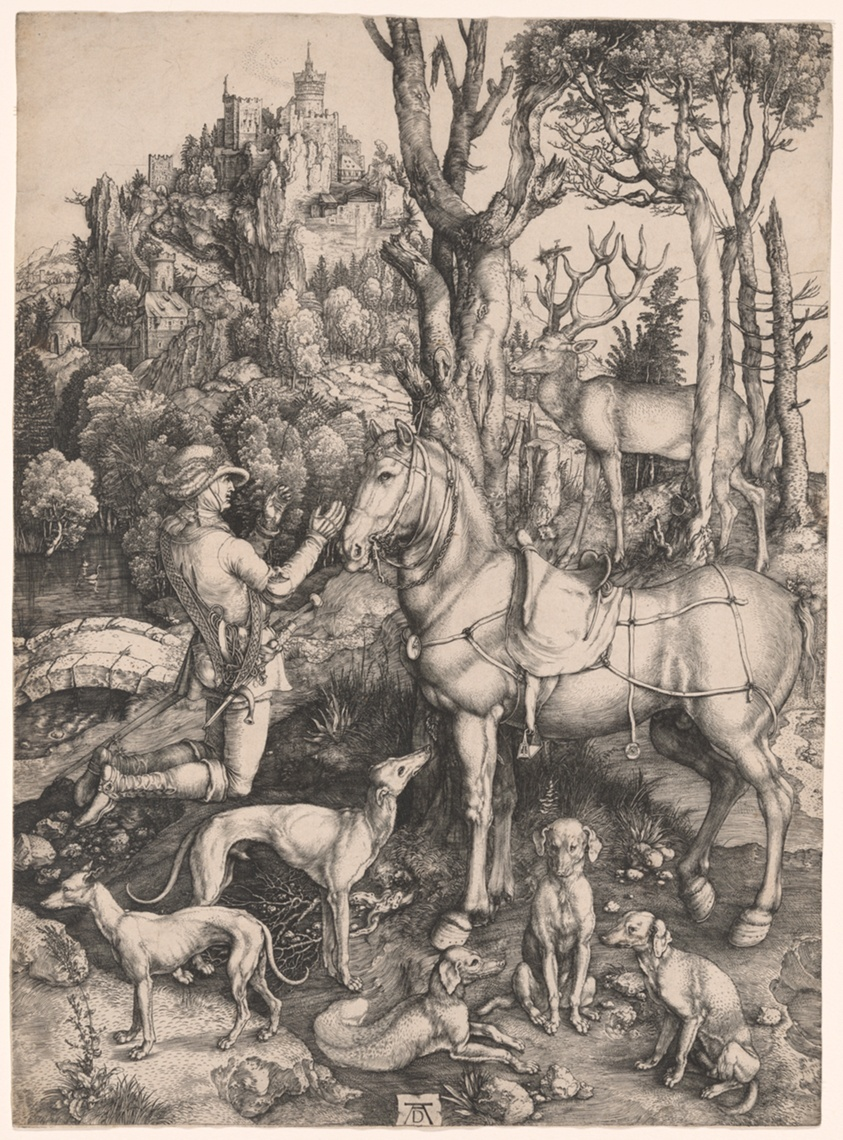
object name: Print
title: Saint Eustace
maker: Albrecht Dürer (German, 1471-1528)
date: c. 1501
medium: Engraving in black on ivory laid paper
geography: Germany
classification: engraving; print; prints and drawing; paper